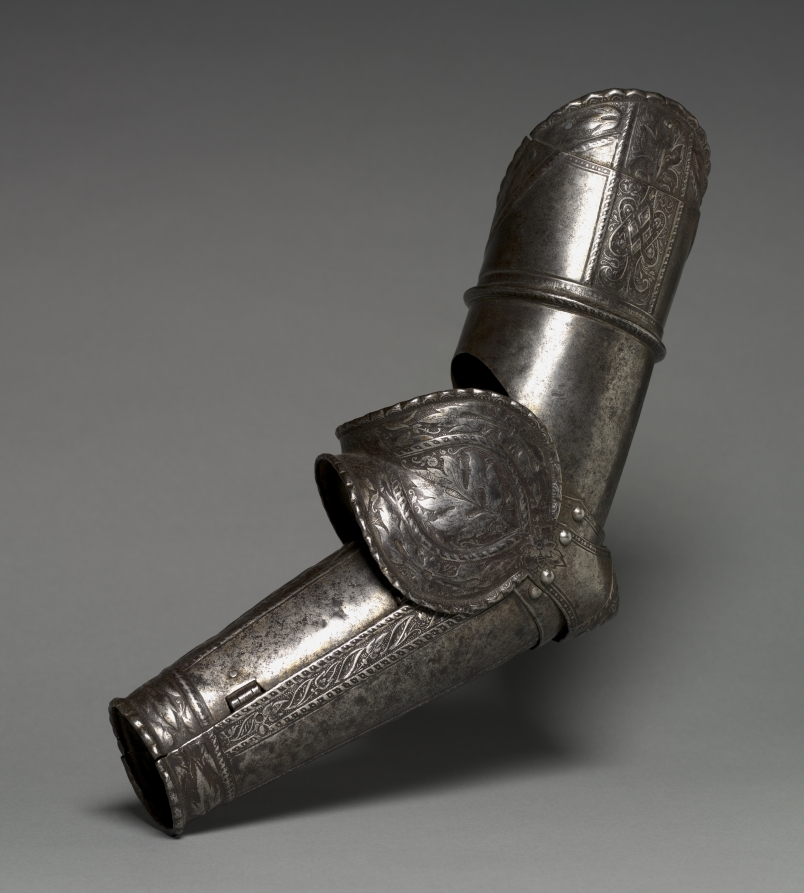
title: Left Arm Elements from a Boy's Armor (Lower Cannon, Couter, Rerebrace)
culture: Germany, Augsburg, mostly 17th Century (some modern)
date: c. 1560 (some modern)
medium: etched and lightly embossed steel with traces of gilding, leather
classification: Arms and Armor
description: These elements once belonged to a full suit of armor that would have been made for a young boy. Decorated with etching, embossing, and gilding, the original suit would have been impressive. Dressing your sons in small custom suits of armor was popular with the wealthiest nobles. They would have been worn for parades and ceremonial occasions and once outgrown were often kept as mementos. Made for the left arm, the rerebrace or upper cannon protected the upper arm, the couter the elbow, and the lower cannon the forearm.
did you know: Small-scale suits of armor would help prepare a young boy for knighthood.